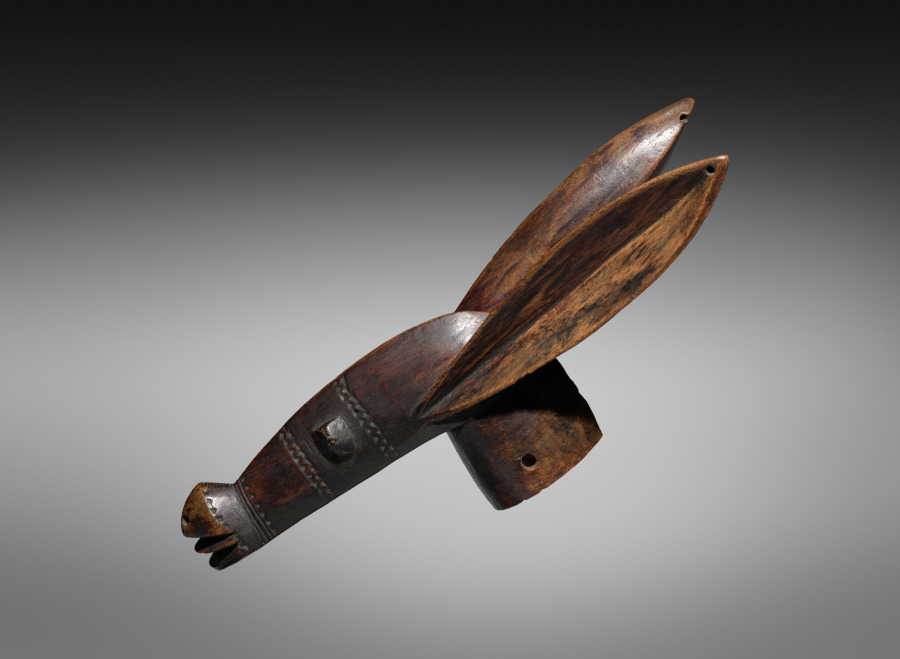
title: Head of a Hobbyhorse (korèdugaso)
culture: Africa, West Africa, Mali, Bamana blacksmith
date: late 1800s–early 1900s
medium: Wood and iron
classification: Sculpture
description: Pertaining to the male initiation society called Korè, this sculpture from the Koulikoro region represents the head of an aardvark and is part of a wooden hobbyhorse that is mounted by a ritual buffoon. The Korè initiates are divided into different classes, each having a designated mask. The ritual buffoons appear in pantomimes on different public occasions and poke fun at village authorities and other high-ranking individuals.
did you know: This is one of the best-known examples of a korèdugaso. It was featured on the catalogue cover for a 1935 exhibition at the Museum of Modern Art, one of the first on African arts in the US. It traveled to the CMA that same year.